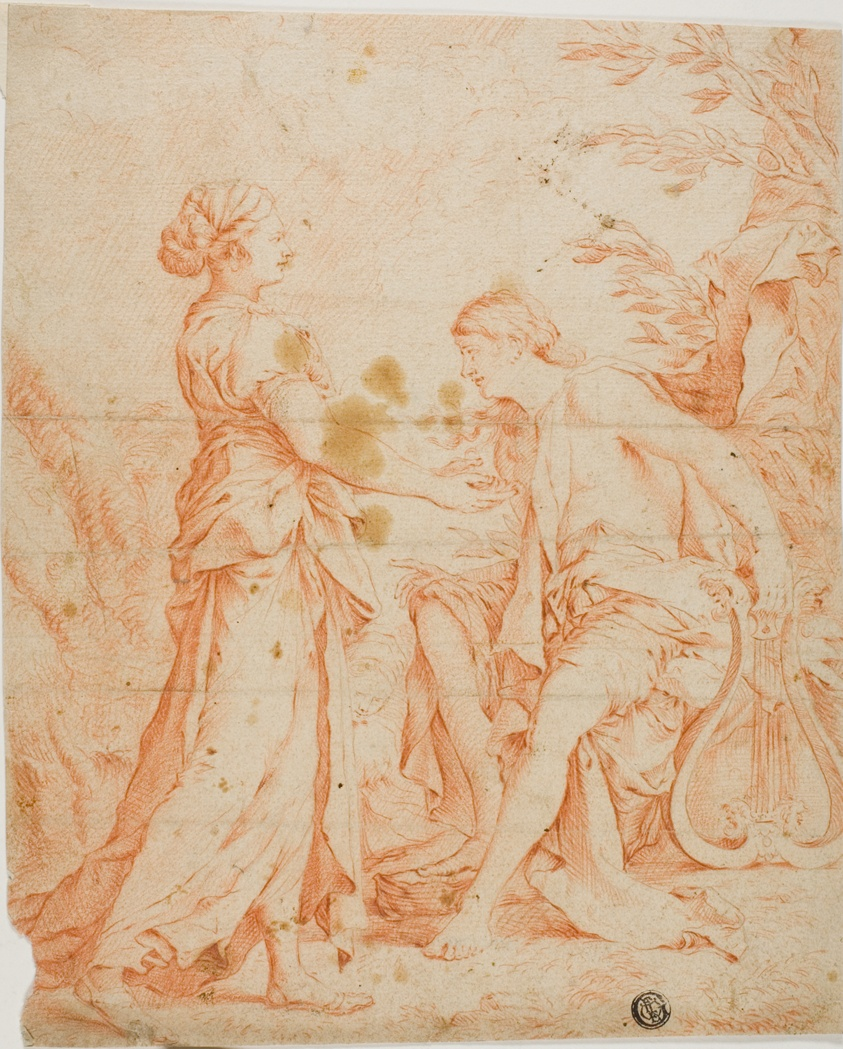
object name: Drawing and Watercolor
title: Apollo and the Cumean Sybil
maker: After Salvator Rosa; Italian, 1615-1673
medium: Red chalk with graphite additions, on cream laid paper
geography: Italy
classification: chalk; drawings (visual works); prints and drawing